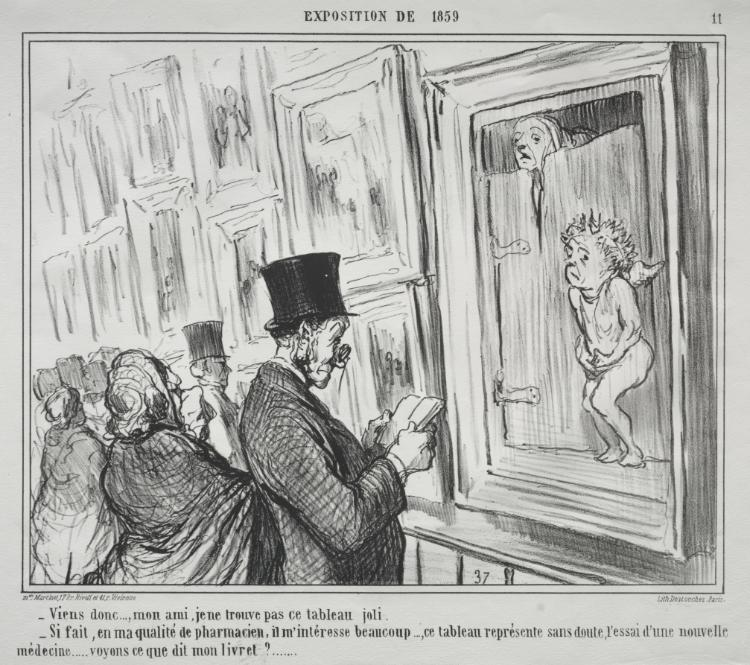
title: Come on, my friend, I do not find this painting beautiful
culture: France, 19th century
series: The Exhibition of 1859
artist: Honoré Daumier (French, 1808–1879)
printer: Destouches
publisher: Mon. Martinet, r. Rivoli, et 41 r. Vivienne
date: 1859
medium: lithograph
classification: Print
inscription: Above image, printed: EXPOSITION DE 1859 / 11 ; Below image, printed: - Viens donc..., mon ami, je ne trouve pas ce tableau joli. / - Si fait, en ma qualité de pharmacien, il m'intéresse beaucoup..., ce tableau represésente sanas doute, l'essai d'une nouvelle / médecine..... voyons ce que dit mon livret?.......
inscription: Upper margin, in pencil: H.D. 1739 ; lower margin, printed: Mon. Martinet, 172, r. Rivoli et 41, r. Vivienne. / Lith. Destouches, Paris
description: This print was published in Le Charivari (June 21, 1859) as plate 11 from the series The Exhibition of 1859.